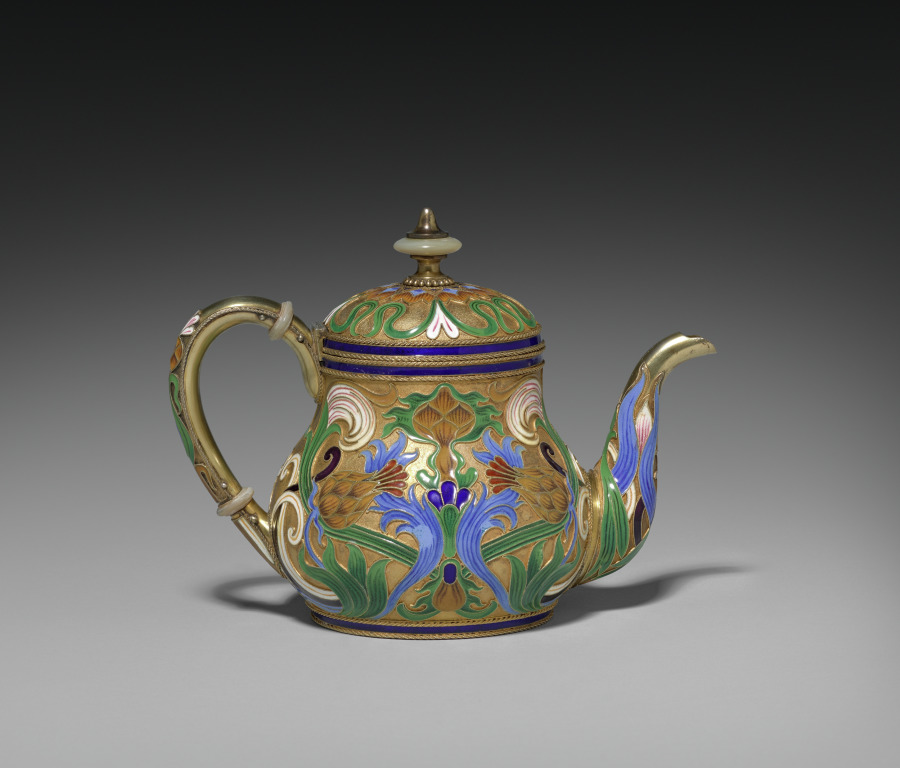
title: Covered Teapot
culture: Russia, St. Petersburg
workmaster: attributed to Feodor Ivanovich Rückert (Russian, 1840–1917)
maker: House of Fabergé (Russian, 1842–1918)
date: 1887–96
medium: silver gilt, opaque cloisonné enamel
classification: Miscellaneous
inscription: 84, St. George [assay mark for Moscow, 1882-1896]; C. Fabergé (in Cyrillic); double-headed eagle [imperial warrant]; St. George; initials of Carl Fabergé (in Cyrillic).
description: Fabergé’s craftsmen in Moscow, especially under the watchful eye of workmaster Feodor Rückert, became known for their work in the pan-Slavic or neo-Russian style, hearkening back to 17th-century motifs of Russian folk art. Often on rather conventional shapes, Rückert and his silversmiths created an explosion of color, achieved through the historic technique of cloisonné enamel in which tiny metal lines are soldered to the surface then filled with glass powders in various colors and fired to create a high gloss finish. The result is a spectacular evocation of the 17th-century originals. Far from mere copies, however, Rückert's designs, such as this tea service, employ naturalistic or abstract motifs in a thoroughly modern adaptation of a remarkable earlier period of Russian art and decoration.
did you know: This covered teapot is part of a larger tea service.